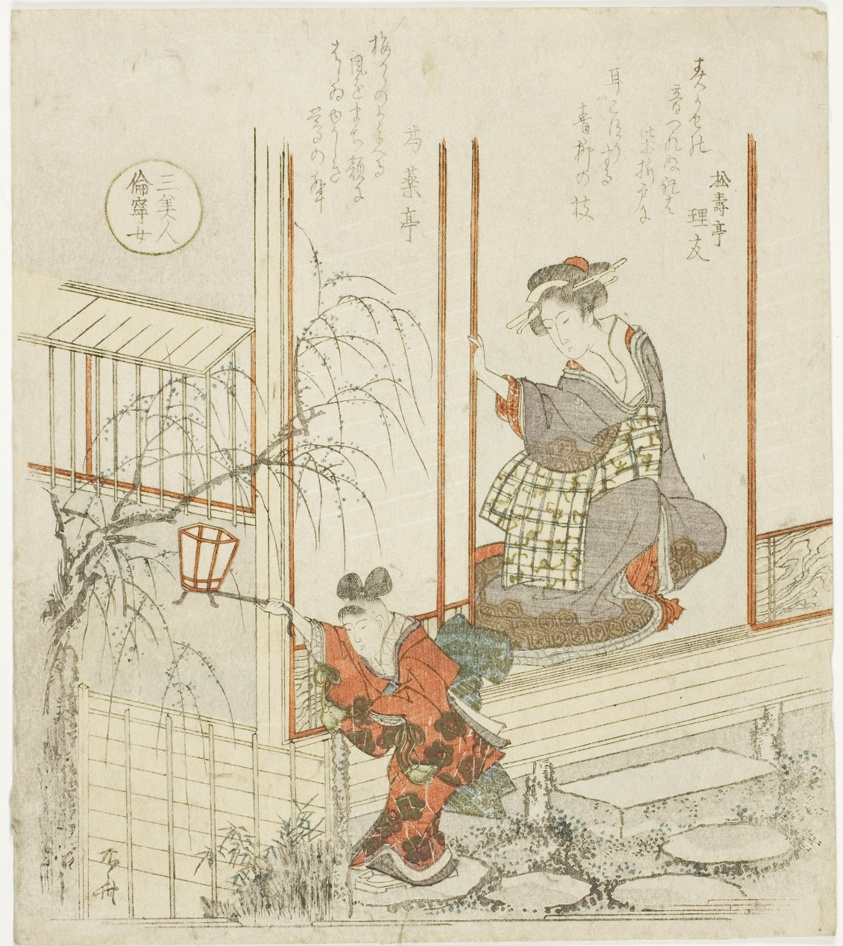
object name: Print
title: The Daughter of Tomoyasu (Tomoyasu no musume), from the series "Three Beautiful Women (San bijin)"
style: Japanese (culture or style)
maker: Ryuryukyo Shinsai (Japanese, c. 1764-1820)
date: c. 1820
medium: Color woodblock print; shikishiban, surimono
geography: Japan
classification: woodblock print; print; asian art